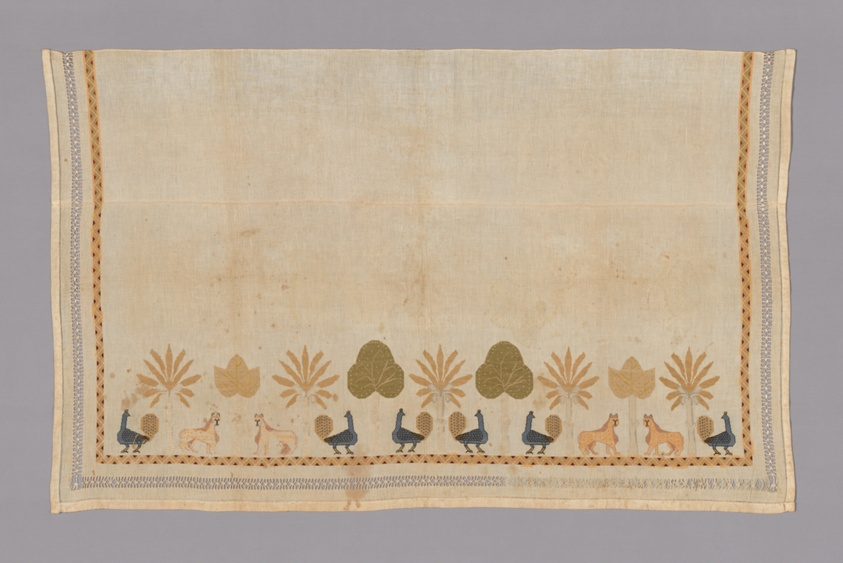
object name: Textile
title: Panel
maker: Possibly Egypt or Turkey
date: c. 1880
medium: Cotton, plain weave; cut and drawnwork embroidered with silk floss and gold gilt strip wound around a cotton fiber core in darning and hem stitches and darned wheels; and embroidered in back, cross, and satin stitches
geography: Egypt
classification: textile; weaving; needlework (visual works)